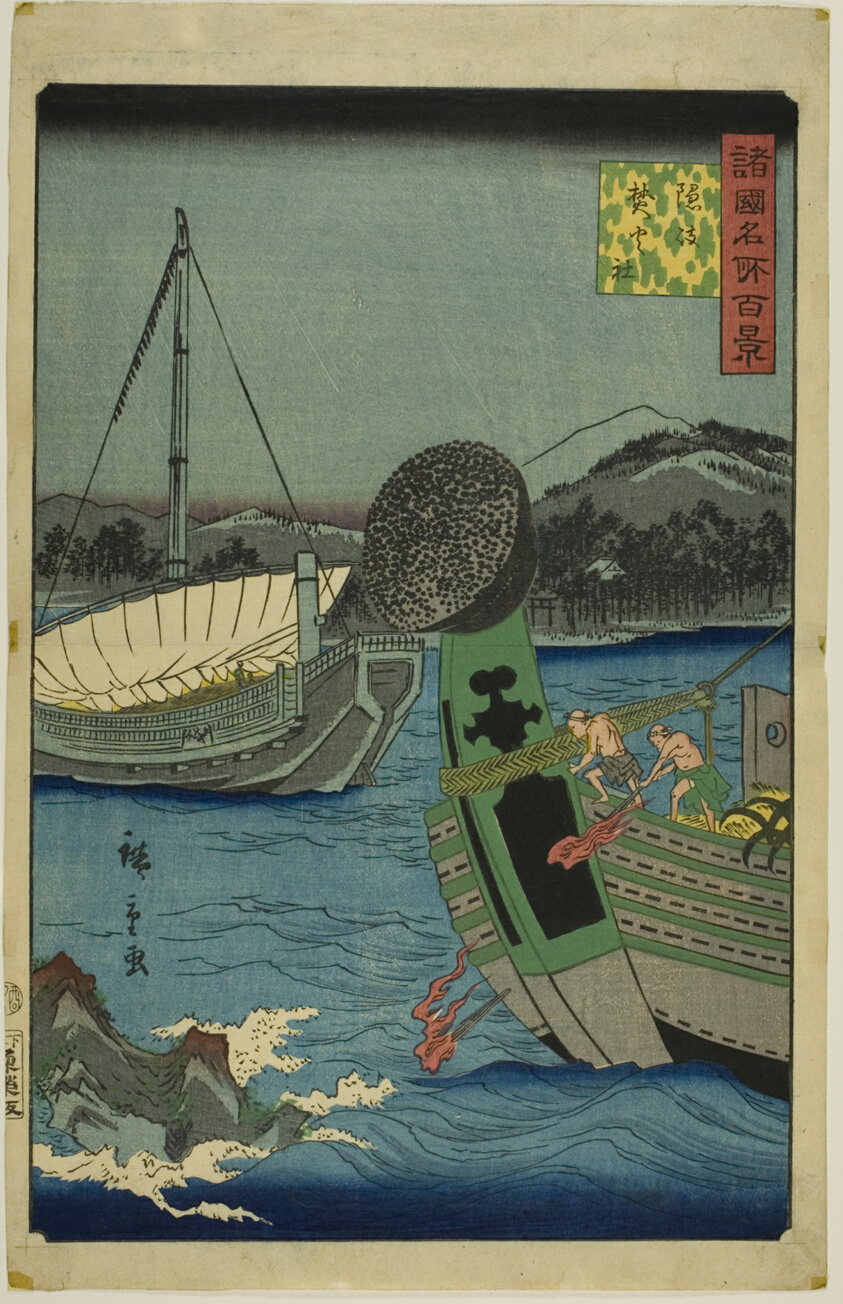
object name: Print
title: Takibi Shrine, Oki Province (Oki Takibi yashiro) from the series “One Hundred Famous Views in the Various Provinces (Shokoku meisho hyakkei)”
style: Japanese (culture or style)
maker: Utagawa Hiroshige II (Shigenobu) (Japanese, 1826–1869)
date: 1861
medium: Color woodblock print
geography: Japan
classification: woodblock print; print